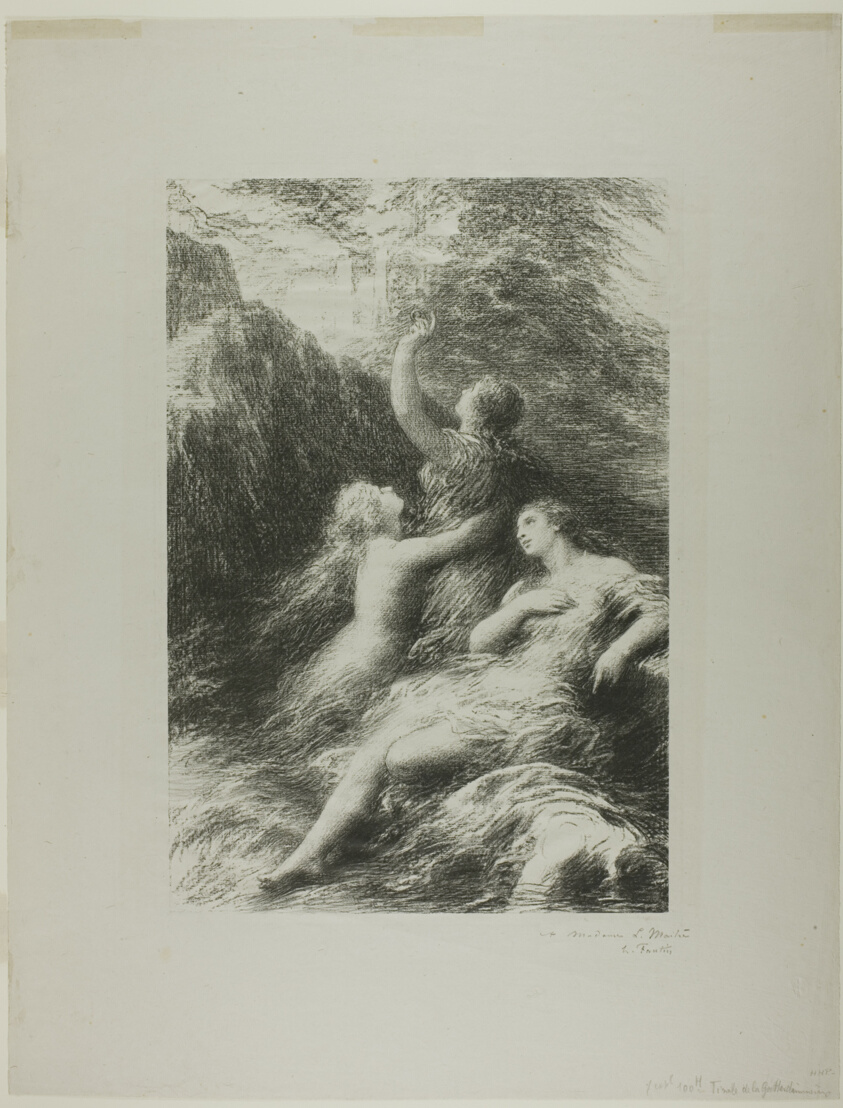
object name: Print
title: Finale to the Twilight of the Gods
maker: Henri Fantin-Latour (French, 1836-1904)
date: 1892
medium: Lithograph in black with scraping on stone on grayish-ivory laid china paper with brushmarks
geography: France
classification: lithograph; print; prints and drawing